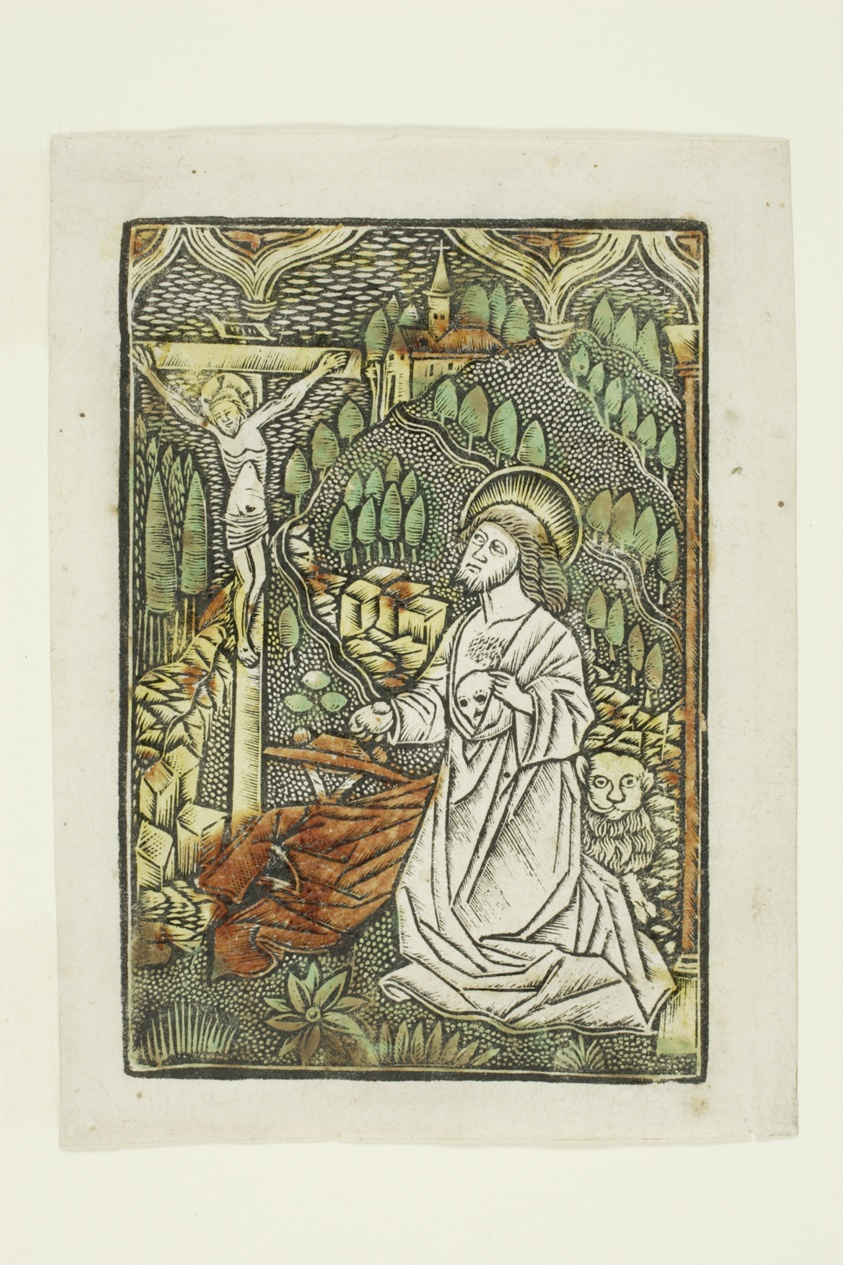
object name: Print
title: Penitence of Saint Jerome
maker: Unknown artist; German, active c. 1480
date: c. 1480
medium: Metalcut with hand-coloring on paper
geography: Germany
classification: dotted/metal cut; print; prints and drawing